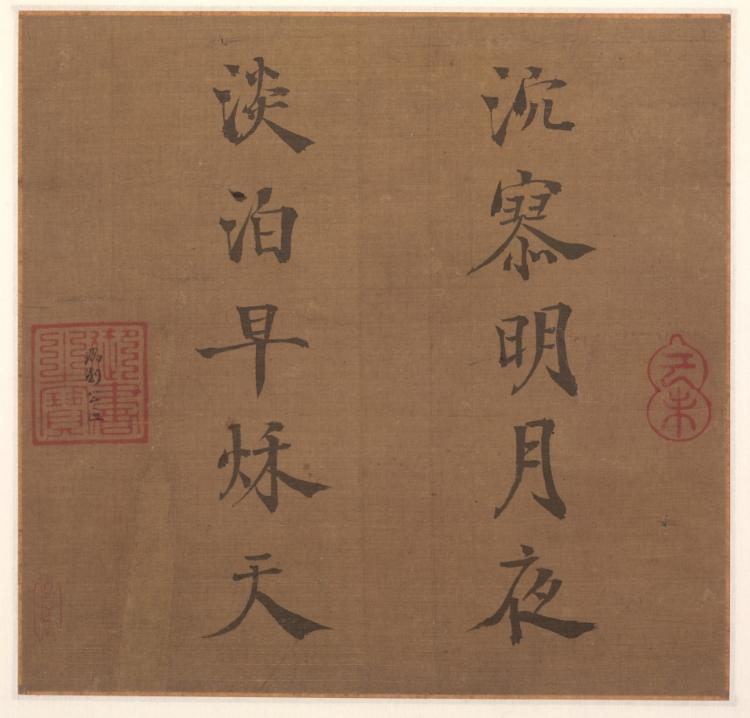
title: Poem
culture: China, Southern Song dynasty (1127-1279)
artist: Song Lizong (Chinese, 1205–1264)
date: 1259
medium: Album leaf; ink on silk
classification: Calligraphy